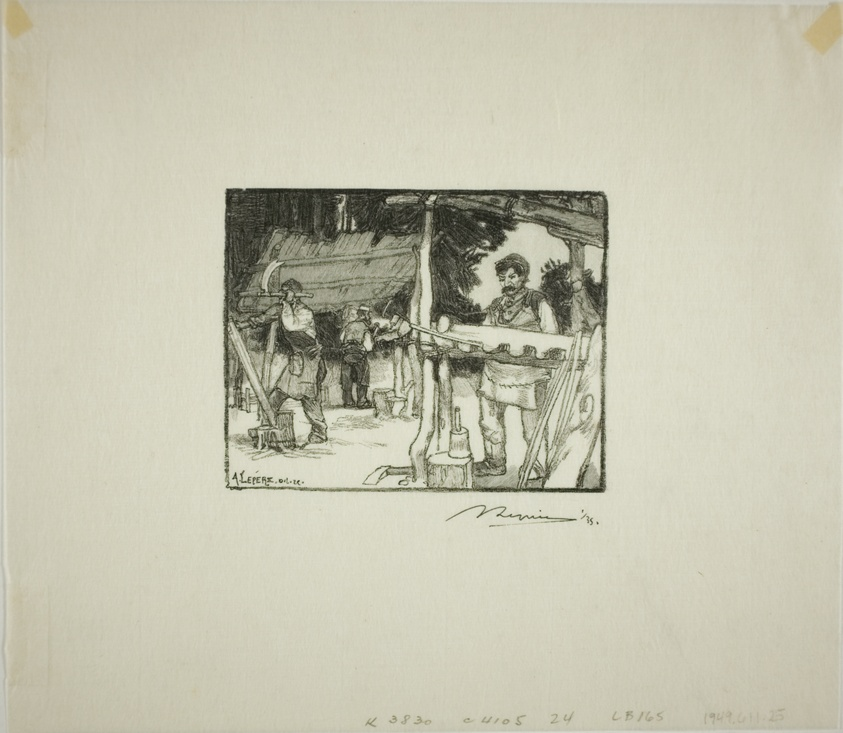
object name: Print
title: Lath-Makers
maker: Louis Auguste Lepère (French, 1849-1918); published by A. Desmoulins (French, active c. 1908-1910)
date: 1888, published 1908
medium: Wood engraving in black on cream laid Japanese paper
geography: France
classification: wood engraving; print; prints and drawing